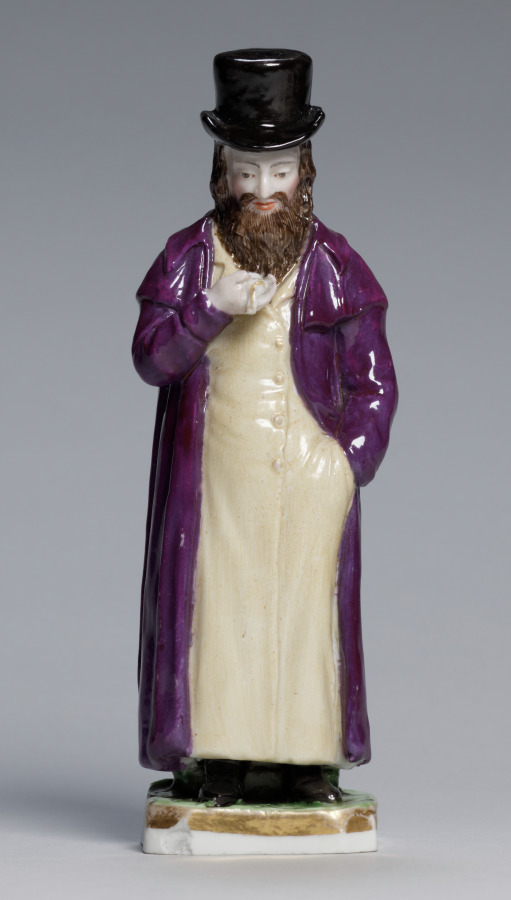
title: Man Holding a Watch (The Buyer)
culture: Russia, Moscow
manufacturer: Gardner Factory (Russian)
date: c. 1820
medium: porcelain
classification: Ceramic